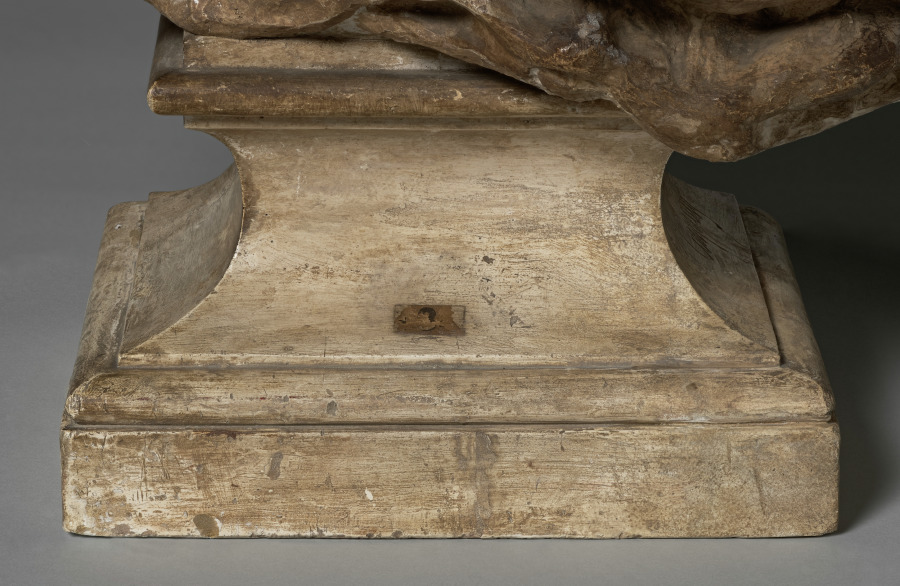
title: Why Born Enslaved!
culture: France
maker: Jean-Baptiste Carpeaux (French, 1827–1875)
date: 1867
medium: Plaster, original polychromed surface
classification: Sculpture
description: One of the most powerful expressions of abolitionist sentiment in the visual arts, Why Born Enslaved! depicts an African woman bound by ropes and looking defiantly upward. The ropes press painfully into her breasts; her torn blouse alludes to the violence responsible for her condition. The original, polychromed surface is covered with complex, nuanced hatchings and subtle modeling. Evidence indicates that this masterpiece of 19th-century French sculpture served as the master model for numerous casts in other museum collections.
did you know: Although officially abolished in France since 1848, slavery remained a hotly contested issue in Carpeaux’s time as it remained legal or tolerated in various countries around the world.